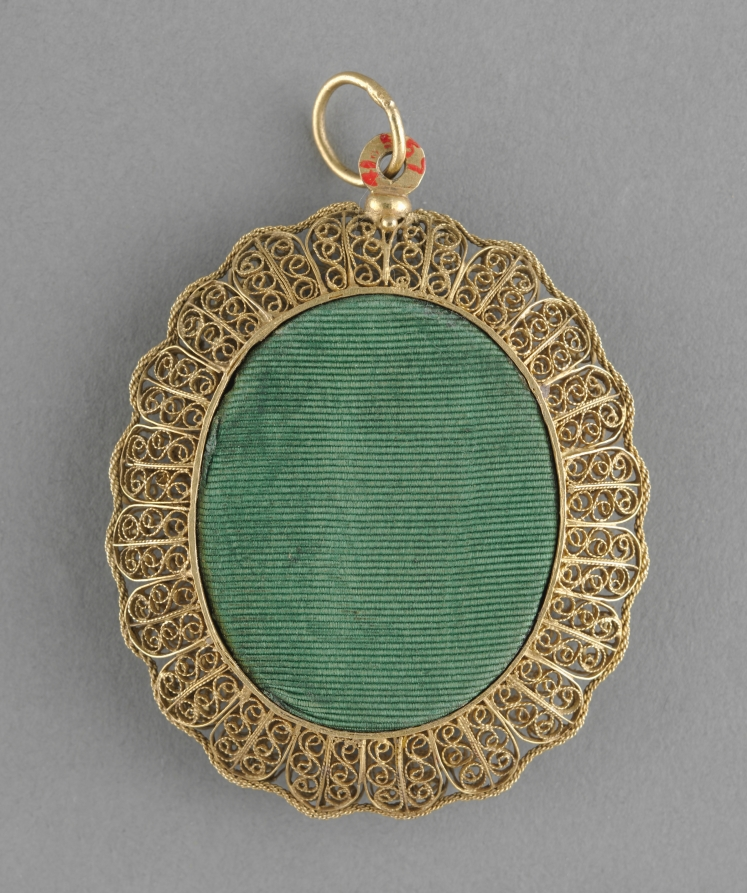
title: Portrait of a Man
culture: England, late 16th century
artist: Nicholas Hilliard (English, c. 1547–1619)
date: 1590s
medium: watercolor on vellum in a later gilt metal frame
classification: Portrait Miniature